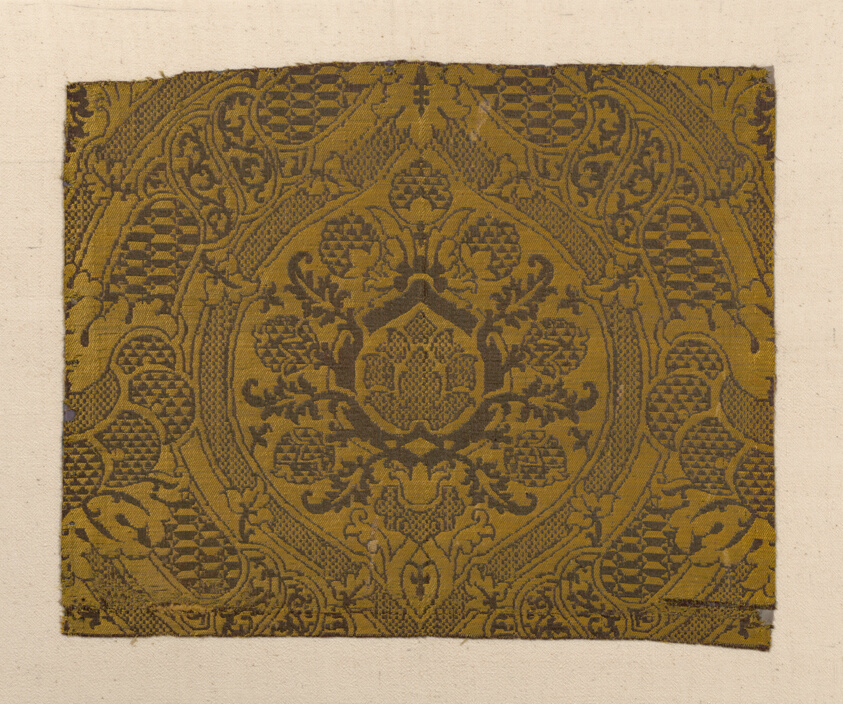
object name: Textile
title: Fragment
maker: Italy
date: 1525/75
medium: Silk, satin weave with twill interlacings of secondary binding warps and patterning wefts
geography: Italy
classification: textile; weaving